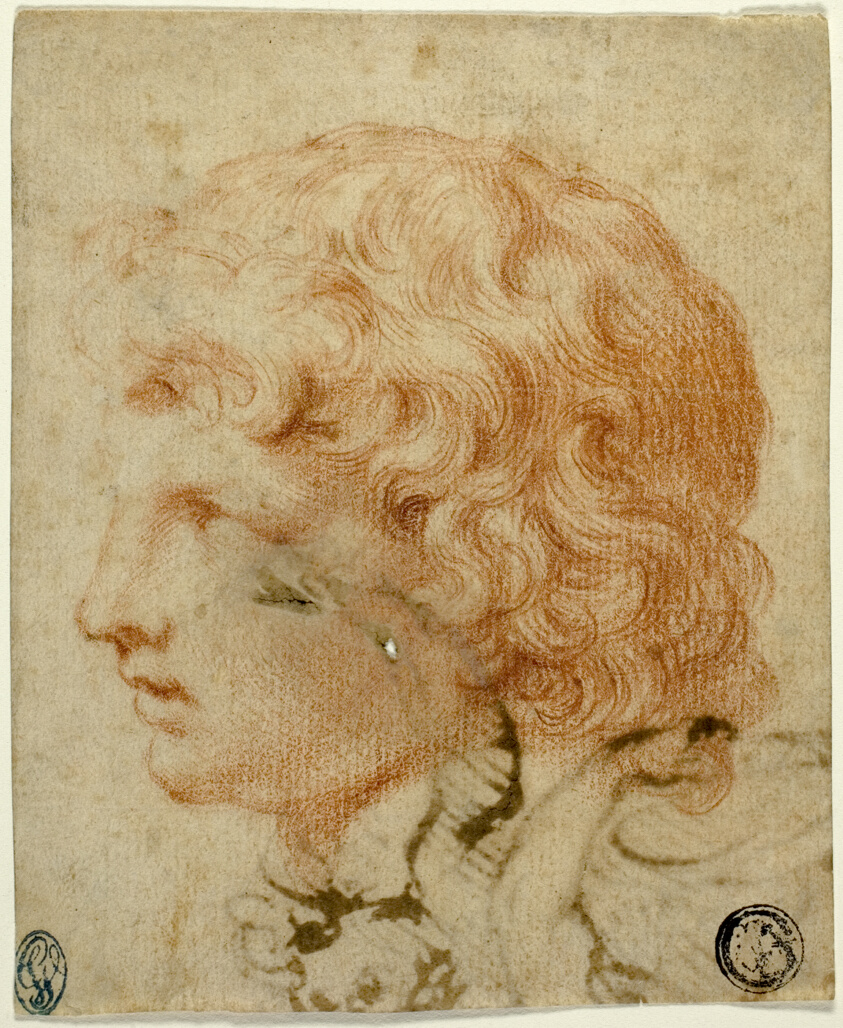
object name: Drawing and Watercolor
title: Head of Youth in Profile to Left (recto); Fragment of Figure Sketch (verso)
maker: Style of Pietro da Cortona (Italian, 1596-1669)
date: 17th century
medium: Red chalk (recto), and pen and iron gall ink over red chalk (verso), on ivory laid paper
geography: Italy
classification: drawings (visual works); prints and drawing